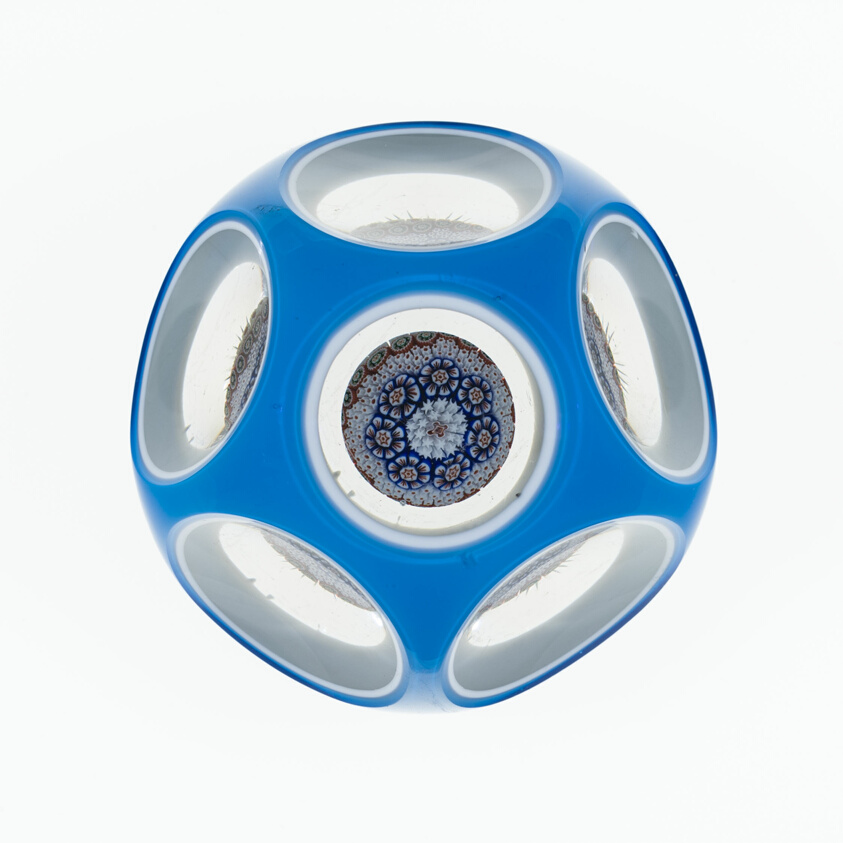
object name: Glass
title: Paperweight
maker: Baccarat Glassworks (Cristalleries de Baccarat); Lorraine, France, founded 1764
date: c. 1845–60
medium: Glass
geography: Baccarat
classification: paperweight; glass